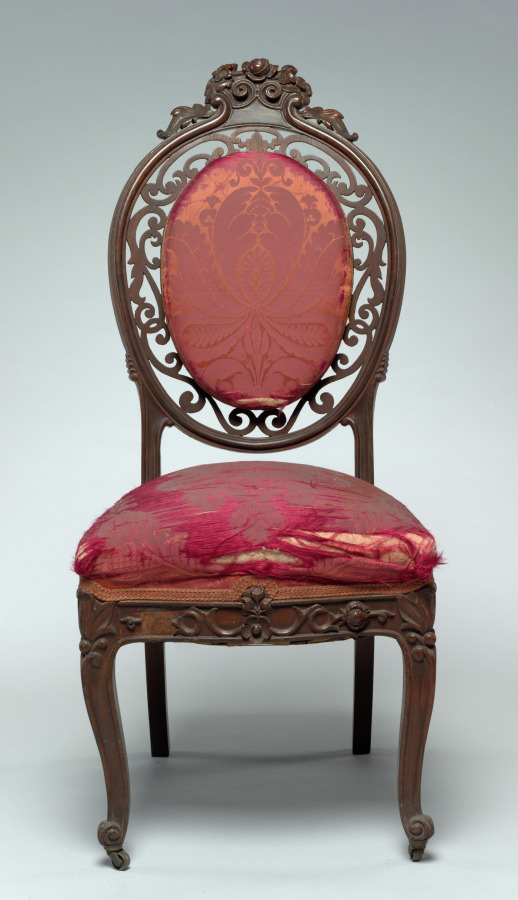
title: Side Chair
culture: America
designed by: Charles H. White (American, 1796–1876)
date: c. 1855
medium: rosewood, red silk damask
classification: Furniture and woodwork